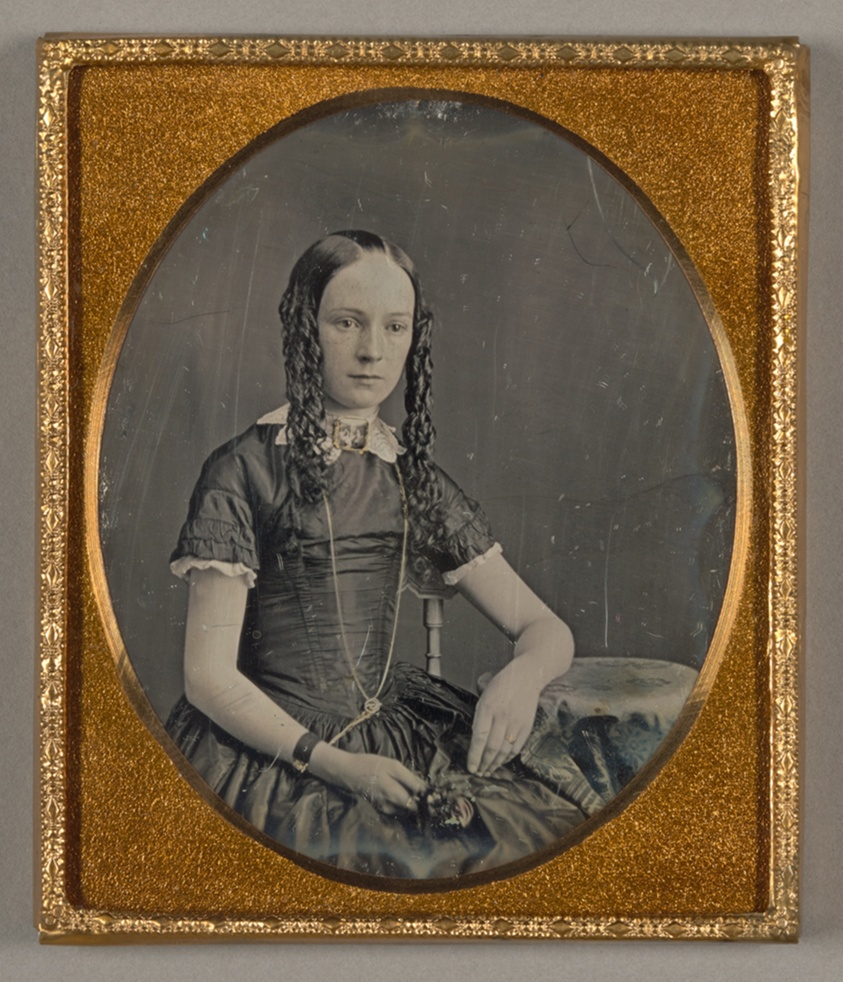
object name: Photograph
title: Untitled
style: 19th century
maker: Artist unknown; 19th century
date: 1839/60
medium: Daguerreotype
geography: Unknown Place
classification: daguerreotype; photographic process; photography; photograph